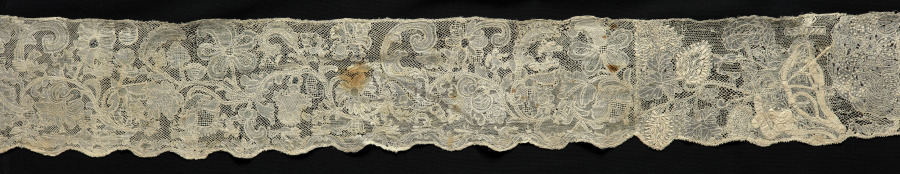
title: Flounce for Alb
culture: Unassigned, 1700s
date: 1700s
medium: Linen: needle lace (drawnwork) and embroidery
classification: Lace